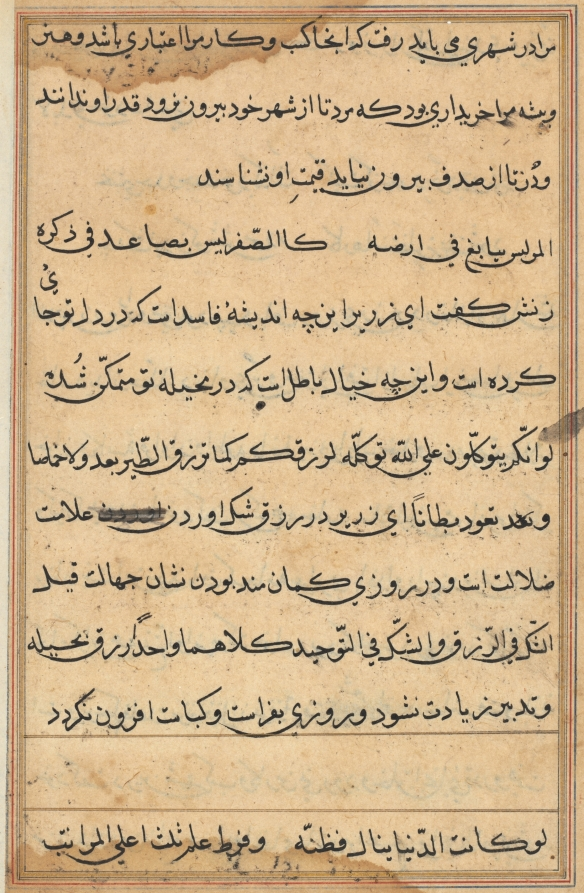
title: Page from Tales of a Parrot (Tuti-nama): text page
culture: Mughal India, court of Akbar (reigned 1556–1605)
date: c. 1560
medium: gum tempera, ink, and gold on paper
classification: Painting